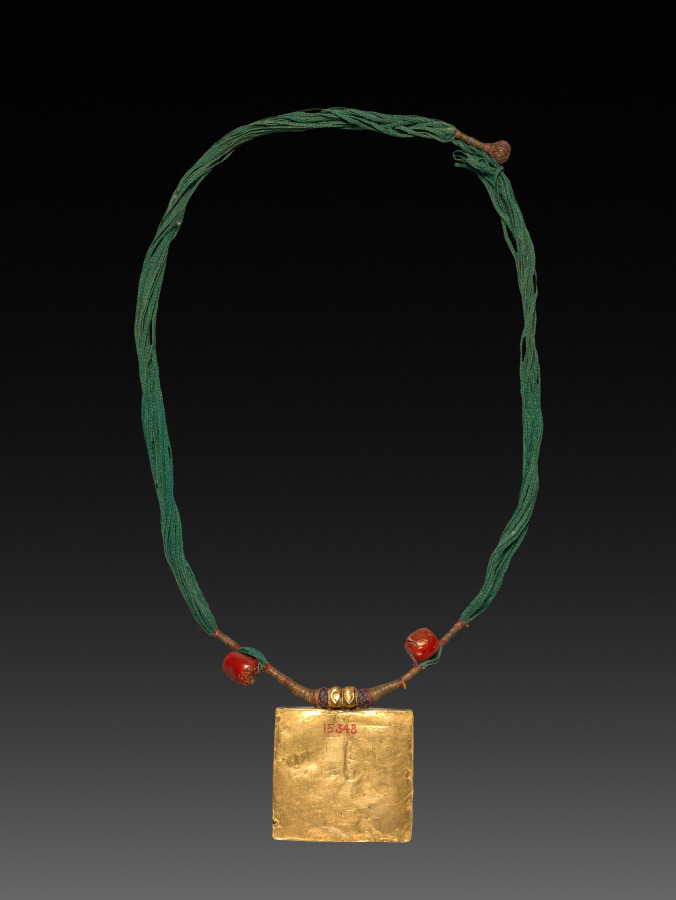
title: Charm Case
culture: Tibet, 19th century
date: 1800s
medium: gold with jewels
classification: Jewelry